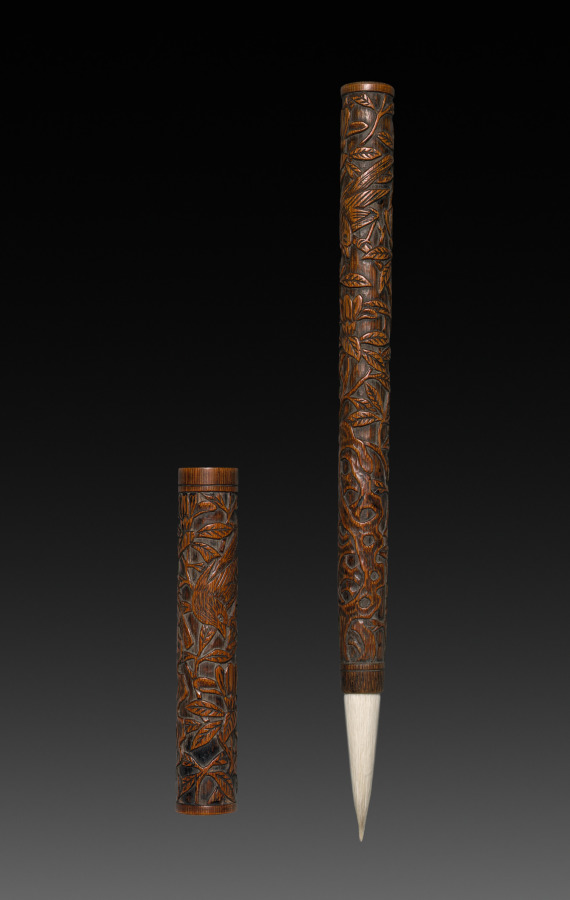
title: Brush with Carved Design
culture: China, Ming dynasty (1368-1644), Wanli mark and reign (1573-1619)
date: 1573–1619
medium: carved bamboo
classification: Wood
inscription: 大明萬曆年製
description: In China, access to political power was granted to those who passed the civil service examinations, a system that offered official service only at a high level of education. Chinese literati-officials, whose daily routine involved administrative work in an office, enjoyed precious objects on their writing desks that offered distraction and demonstrated good taste. By the Ming (1368–1644) and Qing (1644–1911) dynasties, these utensils of the literati studio became also collectibles and were treasured as artworks. A brush, like this one, was essential for both administrative tasks and for artistic creation. The bamboo brush handle and cap were carved in shallow relief with branches, leaves, birds, and flowers. The brush tip was made from fine white animal hairs.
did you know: The inscription on this brush with a bamboo cap reads: Made during the Wanli Era of the Great Ming [dynasty].